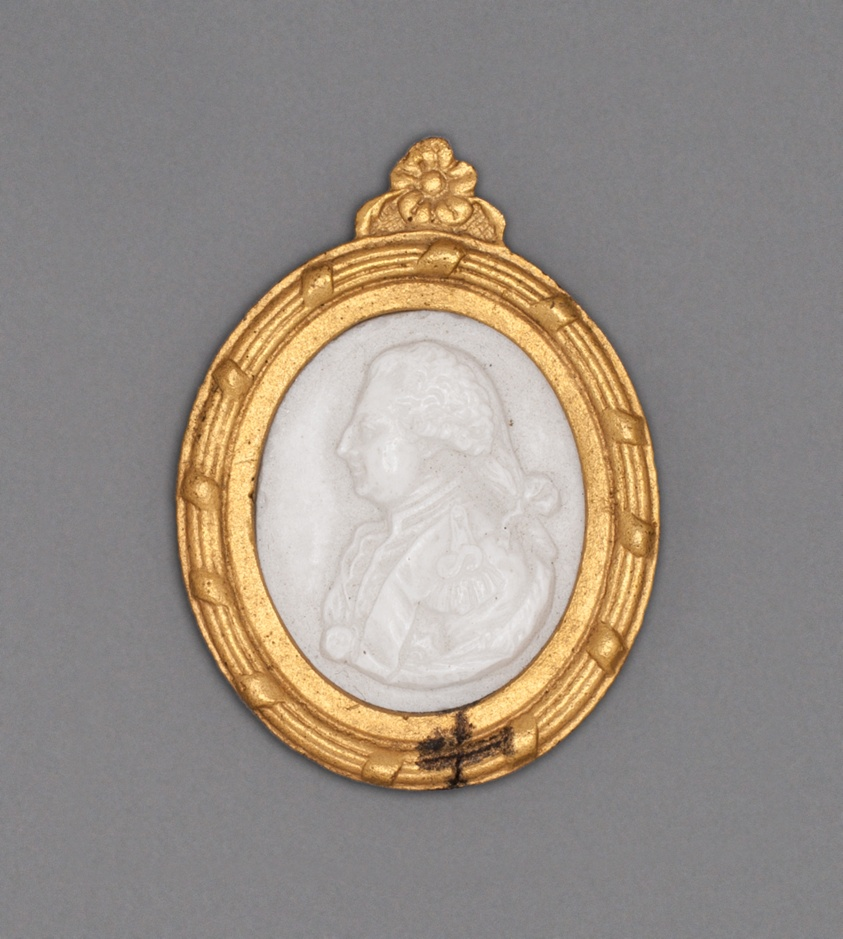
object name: Ceramics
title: Cameo with Head of a Man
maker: Wedgwood Manufactory (England, founded 1759)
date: Late 18th century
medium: Stoneware (jasperware)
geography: Burslem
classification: cameo (sculpture); sculpture; stoneware; european decorative arts; ceramics